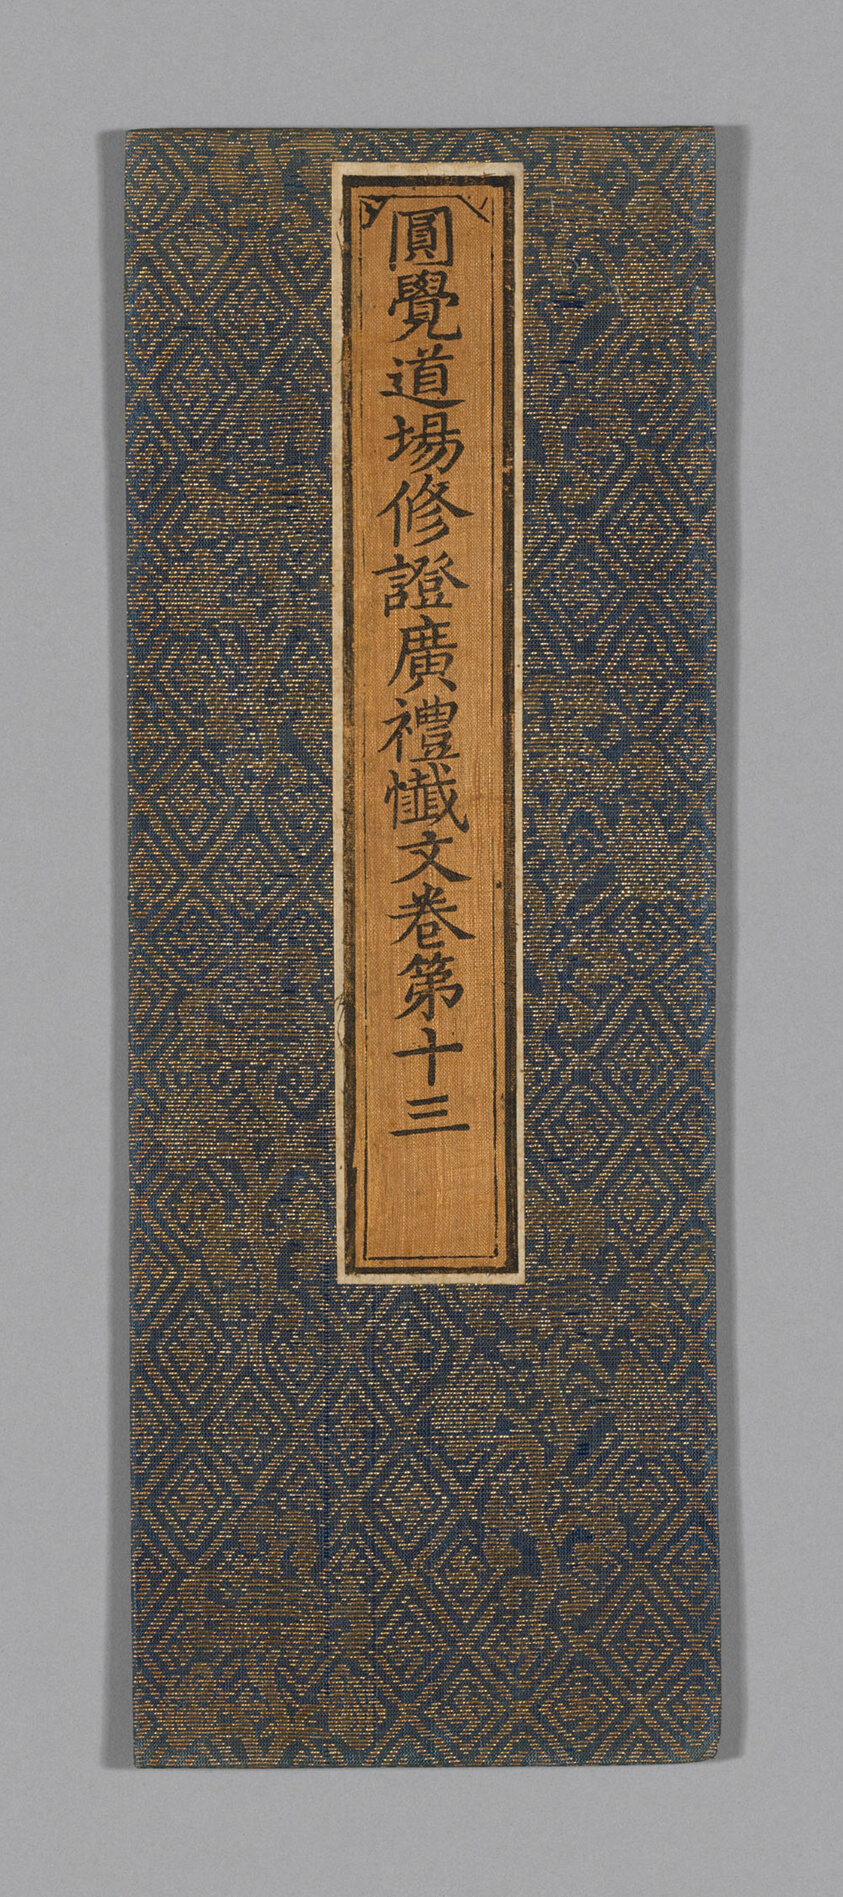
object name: Textile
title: Sutra Cover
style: ming, Chinese (culture or style), East Asian, asian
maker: China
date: Ming dynasty (1368–1644), c. 1590's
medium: Silk and gold-leaf-over-lacquered-paper strip, plain weave with supplementary patterning wefts bound in weft-float faced 1:3 'Z' twill interlacings; label: silk, plain weave; painted with ink, glued over paper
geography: China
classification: textile; weaving